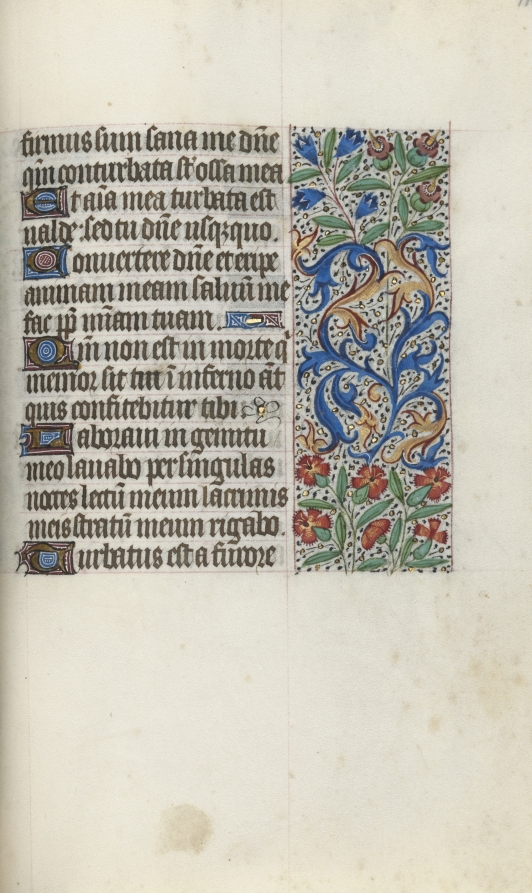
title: Book of Hours (Use of Rouen): fol. 112r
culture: France, Rouen, 15th century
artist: Master of the Geneva Latini (French, active Rouen, 1460–80)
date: c. 1470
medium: ink, tempera, and gold on vellum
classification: Bound Volume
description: In the late 1400s and early 1500s Rouen was an established and important center of book production. The city’s cathedral had a wealthy chapter that spent large sums of money to commission books and to maintain its extensive library. The stationers and booksellers would have likely been concentrated in or near the cathedral precinct. This artist, named after a manuscript now in Geneva, was Rouen’s principal illuminator during the second half of the 1400s.